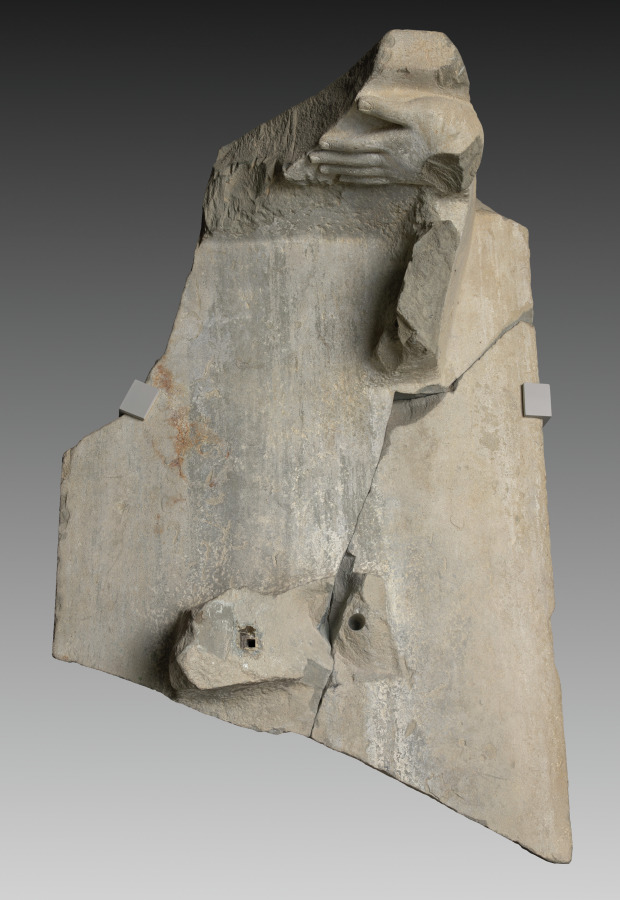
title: Krishna Lifting Mount Govardhan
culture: Southern Cambodia, Takeo Province, Phnom Da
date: c. 600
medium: Sandstone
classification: Sculpture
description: This masterwork of early Cambodian sculpture shows the Hindu god Krishna effortlessly holding aloft a mountain to protect his fellow villagers and herds from torrential storms sent by a jealous old god. It is one of eight monumental monolithic figures recovered from a two-peaked mountain in the floodplains of the Mekong River delta, on the outskirts of the ancient urban center of Angkor Borei.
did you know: Gold earrings were once fastened to the sculpture using holes in the figure's earlobes.